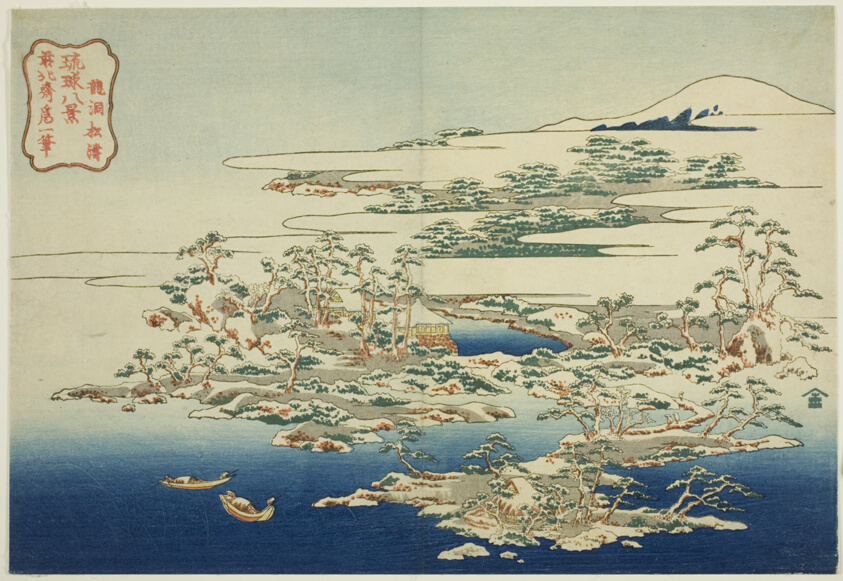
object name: Print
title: The Sound of Wind in the Pines at Ryuto (Ryuto shoto), from the series "Eight Views of the Ryukyu Islands (Ryukyu hakkei)"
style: Japanese (culture or style)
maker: Katsushika Hokusai 葛飾 北斎; Japanese, 1760-1849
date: c. 1832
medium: Color woodblock print; oban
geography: Japan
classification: print; asian art